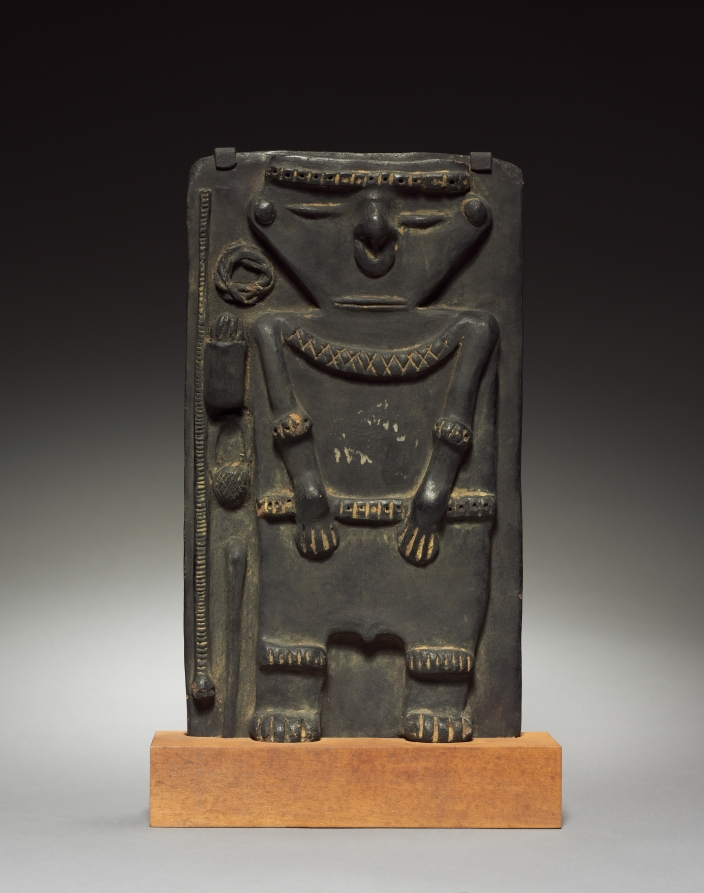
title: Figures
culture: Colombia, 19th-20th century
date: before 1921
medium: pottery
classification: Ceramic